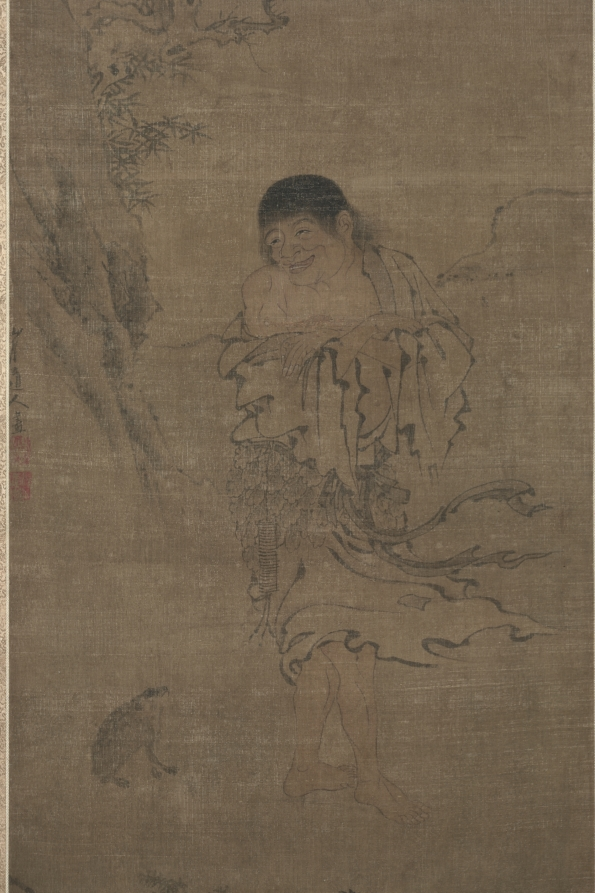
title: Liu Haichan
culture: China, Yuan dynasty (1271-1368)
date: 1300s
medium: Hanging scroll; ink and color on silk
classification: Painting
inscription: Inscribed in upper right corner: The old tree has its green shrouded in mist/ In the depth of the mountain the moon is bright/ By no means could the eyes of the dusty world/ Understand these particular feelings. Shan-yüeh tao-jen [seal] Shan-yüeh (?)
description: Liu Haichan is a Daoist immortal sometimes included in the Eight Immortals. He is often shown as a young man wearing bangs across his forehead. He was said to have lived during the Five Dynasties period (907–979) and left his position as a grand councilor to become a hermit. Usually depicted carrying a string of coins and accompanied by a three-legged toad, Liu Haichan became a god of wealth and his toad symbolizes wealth as well. In this scroll, Liu is teasing the three-legged toad with a string of coins tied to his waist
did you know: Because the immortal Liu Haichan is usually depicted with bangs, his eponym, liúhǎi 劉海, means "bangs" in Chinese.